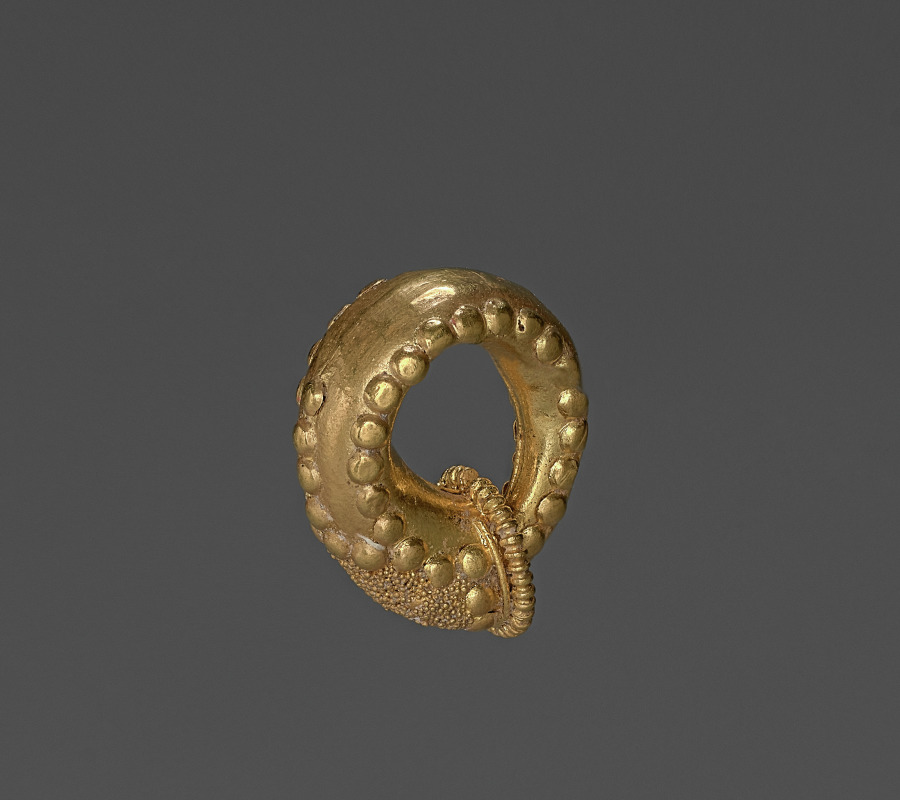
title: Earring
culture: Etruscan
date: 300s BCE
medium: gold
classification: Jewelry